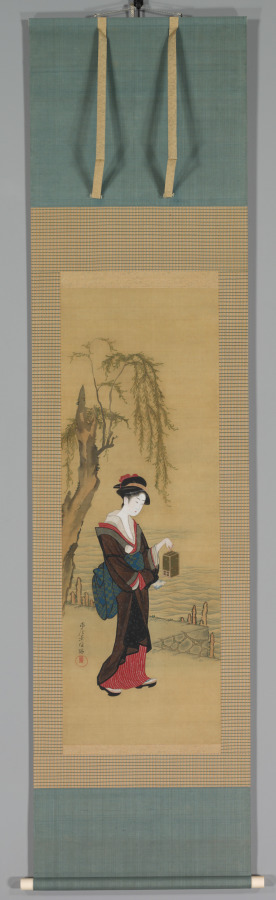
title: Beauty with Fireflies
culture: Japan, Edo period (1615–1868)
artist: copy after Kubo Shunman (Japanese, 1757–1820)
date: early 1800s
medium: Hanging scroll; ink and color on silk (ivory roller ends)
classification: Painting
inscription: Signed at lower left: 尚左堂俊満 Shōsadō Shunman Sealed at lower left: round red seal：俊満 Shunman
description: A young woman has passed beneath an aged willow tree as she strolls along a riverbank carrying a cage full of fireflies. The painting is a copy after Kubo Shunman, best known as a composer of witty verses in 31-syllables (kyōka) and designer of limited edition prints called surimono. Shunman was active during the mature era of ukiyo-e production, and his more formal paintings most often took as their subjects beautiful Chinese or Japanese women. Here, his imitator commemorates one of summer's most delightful evening pastimes, the observation of the flickering lights of the firefly. The woman is presented in a ubiquitous summer setting, a refreshingly cool and breezy riverbank in earshot of rustling willow leaves.